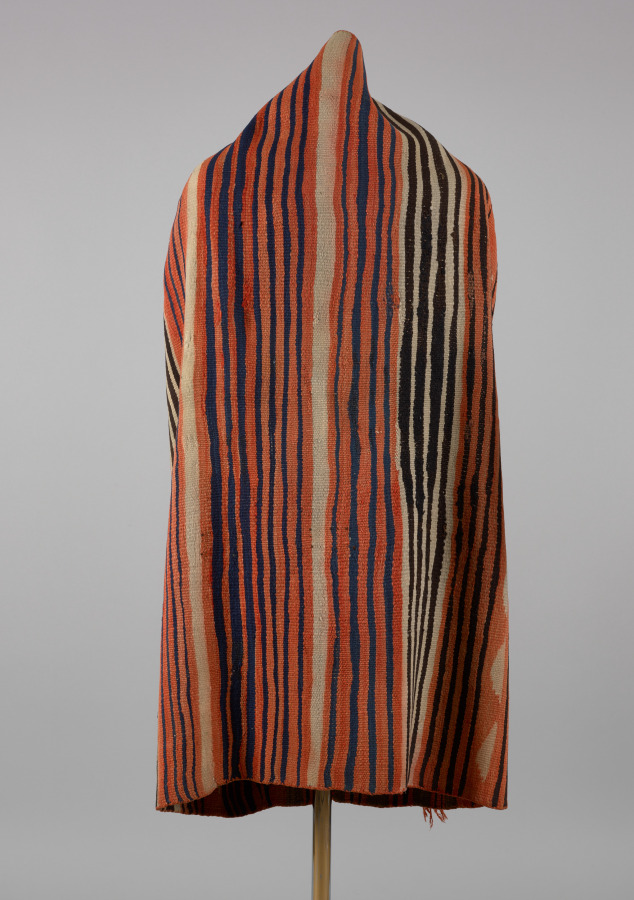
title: Banded Wearing Blanket (Diyugi)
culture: America, Native North American, Southwest, Diné (Navajo) or Zuni Pueblo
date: c. 1880–90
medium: Wool (handspun and bayeta): tapestry weave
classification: Textile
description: This blanket was created during the late 1800s, when weavers in the Southwest began to shift from making garments for Indigenous use, including trade, to additionally create items for non-Native collectors. In this new market, traditional wearing blankets, which were worn around the shoulders, were marketed as rugs.